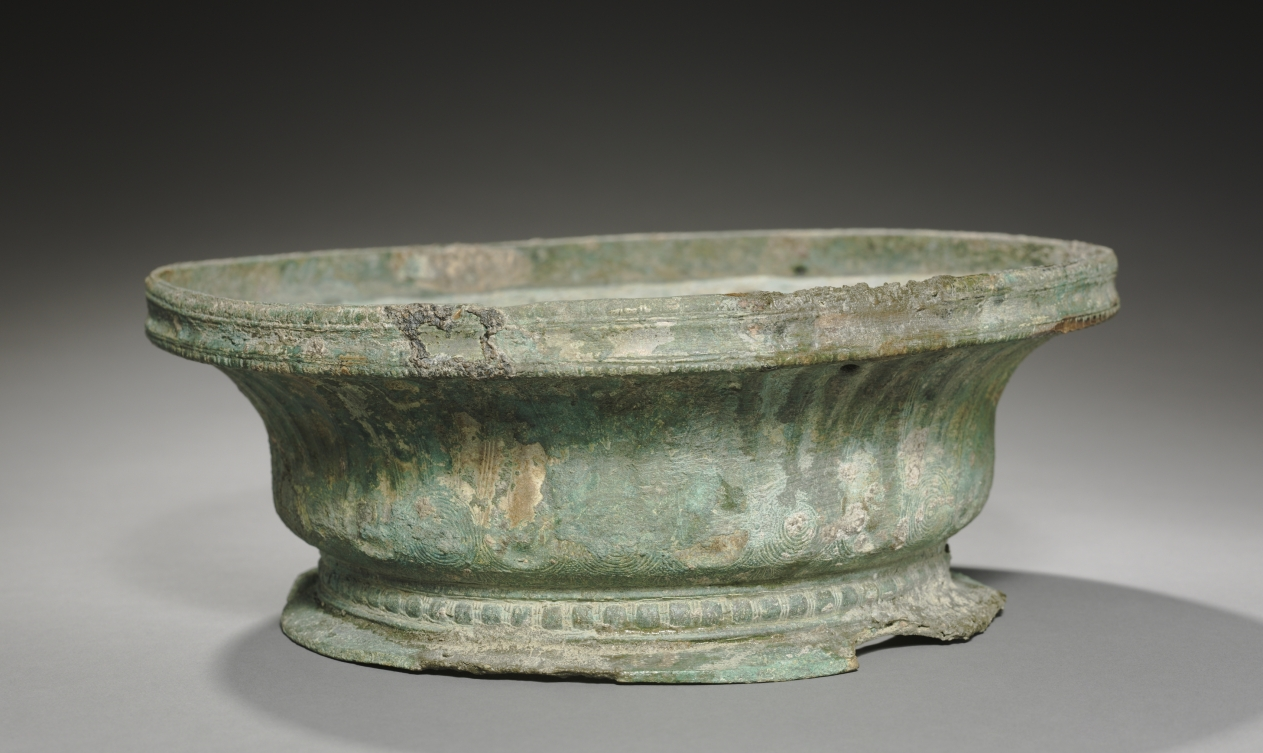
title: Bronze Volute Krater Base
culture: Greece, Laconia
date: late 600s BCE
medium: bronze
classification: Metalwork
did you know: This object supported a large vessel used for mixing wine with water called a krater.